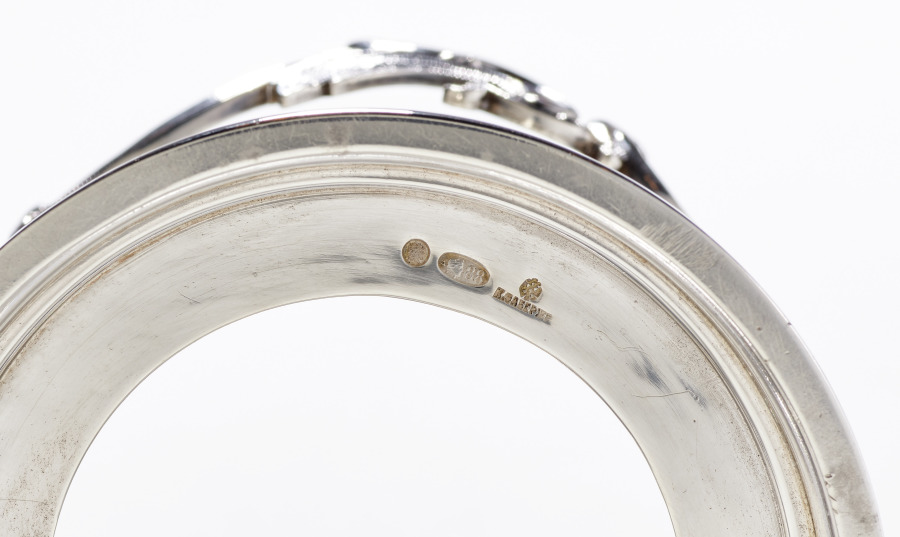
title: Tea Cup Holder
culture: Russian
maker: House of Fabergé (Russian, 1842–1918)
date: c. 1908–1917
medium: silver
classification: Glass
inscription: Greek letter delta (or alpha); profile of a woman (wearing a kokoshka) facing right; "88"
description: This holder and its glass are likely from a larger set. It is an excellent example of Fabergé’s ability to imbue objects of everyday use with exceptional artistry. The holder features elegant scroll motifs forming two horizontal bands and a handle, an ingenious take on the French ornamental style of the mid-eighteenth century.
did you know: In Russia, tea has been served in glasses since the eighteenth century.